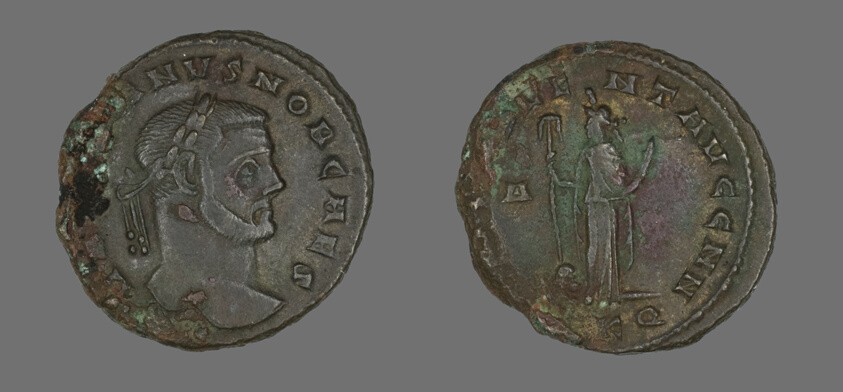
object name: Coin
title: Coin Portraying Emperor Galerius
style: roman (ancient, style or period), ancient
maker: Roman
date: 293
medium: Bronze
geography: Roman Empire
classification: coin; ancient art